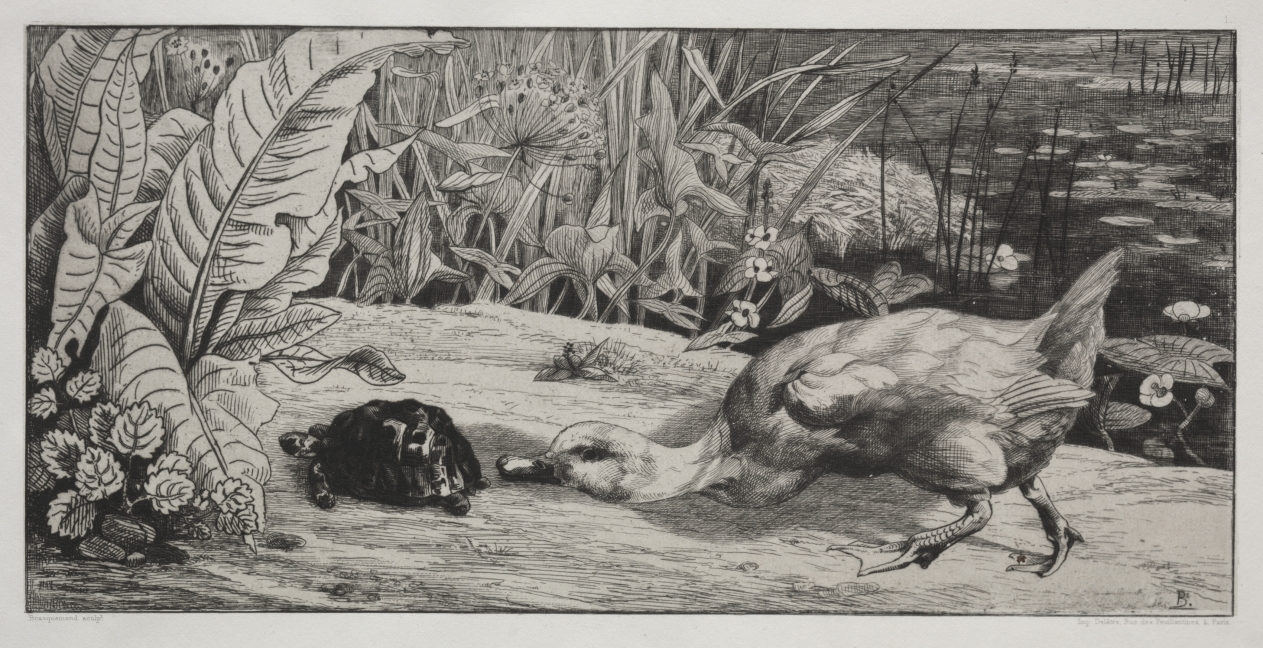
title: An Unknown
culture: France, 19th century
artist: Félix Bracquemond (French, 1833–1914)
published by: A. Cadart and F. Chevalier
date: 1862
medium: etching and drypoint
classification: Print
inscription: signed, lower right, in plate: B.; printed, lower left: Bracquemond sculpt.; printed, lower right: Imp. Delâtre, Rue des Feuillantines, 4, Paris; printed, lower center: L'Inconnu; printed, lower center: Paris, Publié par A. Cadart & F. Chevalier, Éditeurs, Rue Richelieu, 66.